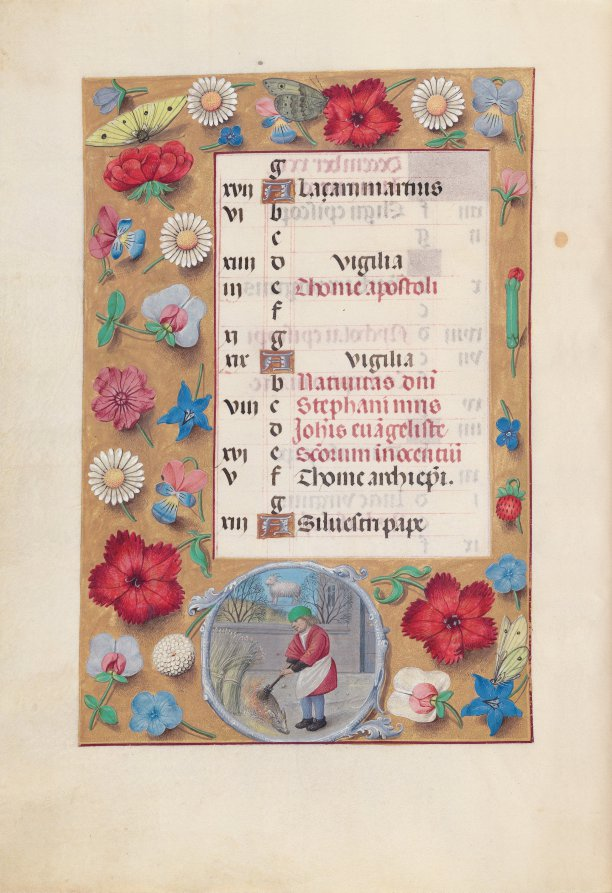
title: Hours of Queen Isabella the Catholic, Queen of Spain: Fol. 13v, December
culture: Flanders, Ghent and Bruges, late 15th century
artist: Master of the First Prayerbook of Maximillian (Flemish, c. 1444–1519)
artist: and Associates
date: c. 1500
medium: ink, tempera, and gold on vellum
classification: Bound Volume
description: This manuscript was illuminated by a circle of at least five highly organized manuscript painters active in the Flemish cities of Ghent and Bruges. The principal illuminator was Alexander Bening, who painted the majority of the book's miniatures. Manuscripts produced by this circle of artists are renowned for the decoration of their borders, which typically feature a rich variety of realistically-painted flowers, birds, and butterflies. This prayer book, called a book of hours, was intended not for a cleric, but for the private devotions of a lay person-in this case, Isabella the Catholic, Queen of Spain (1451-1504). Isabella's coat of arms embellishes the book's frontispiece. It is unlikely that the book was commissioned by the Queen herself; rather, she probably received it as a diplomatic gift from someone courting her patronage, perhaps Cardinal Francisco Jimenez de Cisneros. A Franciscan friar, Jimenez was dependent upon Isabella for his advancement, first to the post of Queen's confessor in 1492, and then to Archbishop of Toledo in 1495.